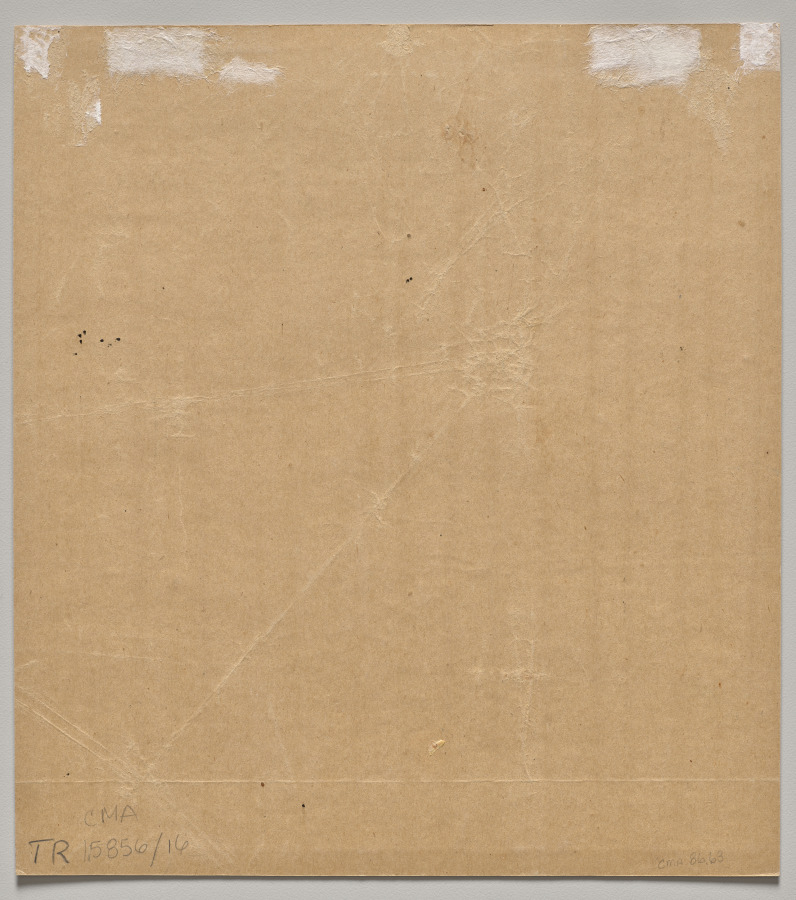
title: Raja Sansar Chand of Kangra and courtiers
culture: Northern India, Pahari kingdoms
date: c. 1783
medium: gum tempera and gold on paper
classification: Painting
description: Ruler of the western Himalayan kingdom of Kangra from 1775 to 1823, Sansar Chand (1765–1823) is seated on a red dais. As a youth at around 18 years of age, he still has not grown a beard, and his distinctive curly bushy hair is visible beneath his pink turban. This portrait may commemorate the Mughals relinquishing control of Kangra in 1783.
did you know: This painting once belonged to Cleveland attorney George P. Bickford, who endowed positions at the CMA and Harvard.